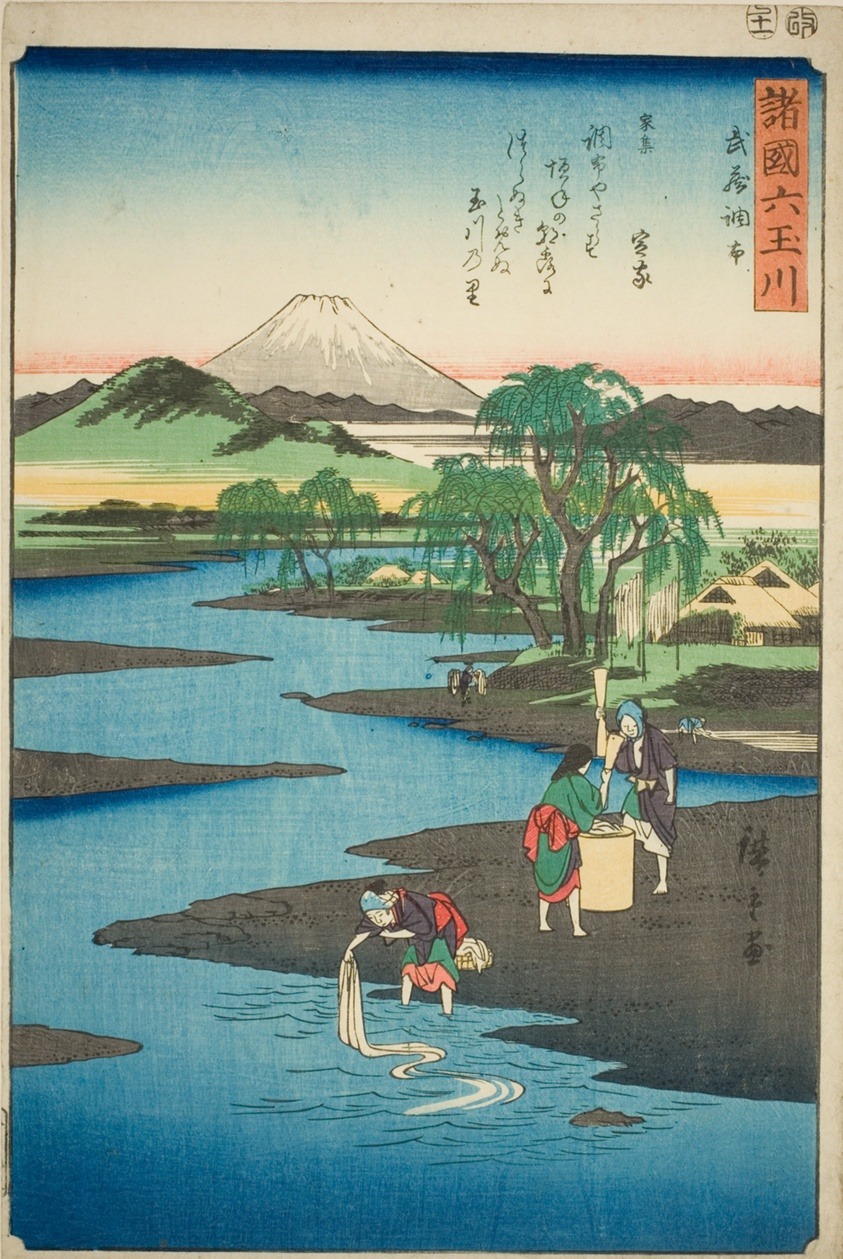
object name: Print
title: The Chofu Jewel River in Musashi Province (Musashi Chofu no Tamagawa), from the series "Six Jewel Rivers in the Various Provinces (Shokoku Mu Tamagawa)"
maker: Utagawa Hiroshige 歌川 広重; Japanese, 1797-1858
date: 1857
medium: Color woodblock print; oban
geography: Japan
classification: woodblock print; print; asian art